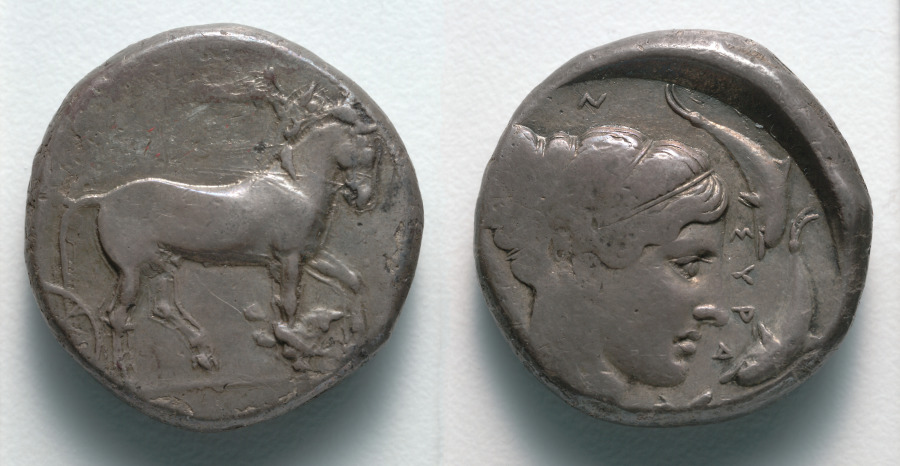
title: Tetradrachm: Quadriga (obverse); Head of Arethousa (reverse)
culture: Greek, minted at Syracuse (Sicily)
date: c. 430–420 BCE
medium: silver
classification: Coins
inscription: ΣΥΡΑΚ[ΟΣΙΟ]Ν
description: The rightmost horse of a chariot team dominates the obverse of this coin, while the other three are suggested only by contours. On the reverse, four dolphins should surround Arethousa, but poor positioning during the striking process has left off one and most of another. The lumps around the horses’ front legs suggest a die defect.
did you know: Arethousa’s banded hairstyle provides remarkable contemporaneous evidence of ancient Greek women’s fashions.